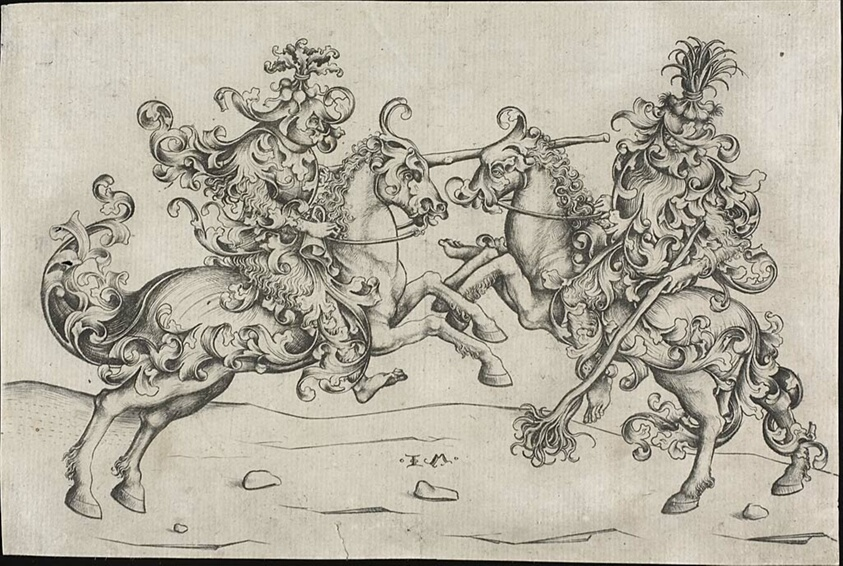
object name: Print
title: Combat of Two Wild Men on Horseback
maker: Israhel van Meckenem the Younger (German, c. 1440/45-1503); after Master of the Housebook (German, active c. 1470-1500)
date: 1475/85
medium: Engraving on ivory laid paper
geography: Germany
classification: engraving; print; prints and drawing